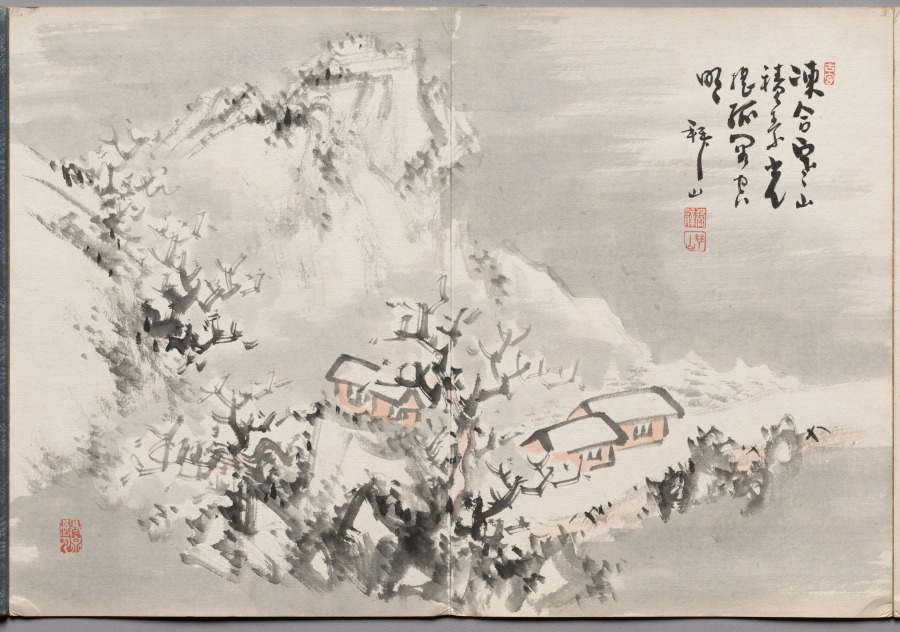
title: Painting Thirteen from Album of Paintings by Haizan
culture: Japan, Meiji period (1868–1912) or Taishō period (1912–26)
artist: Yoshitsugu Haizan (Japanese, 1846–1915)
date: late 1800s–early 1900s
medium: page spread from double-sided accordion album; ink and color on paper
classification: Painting